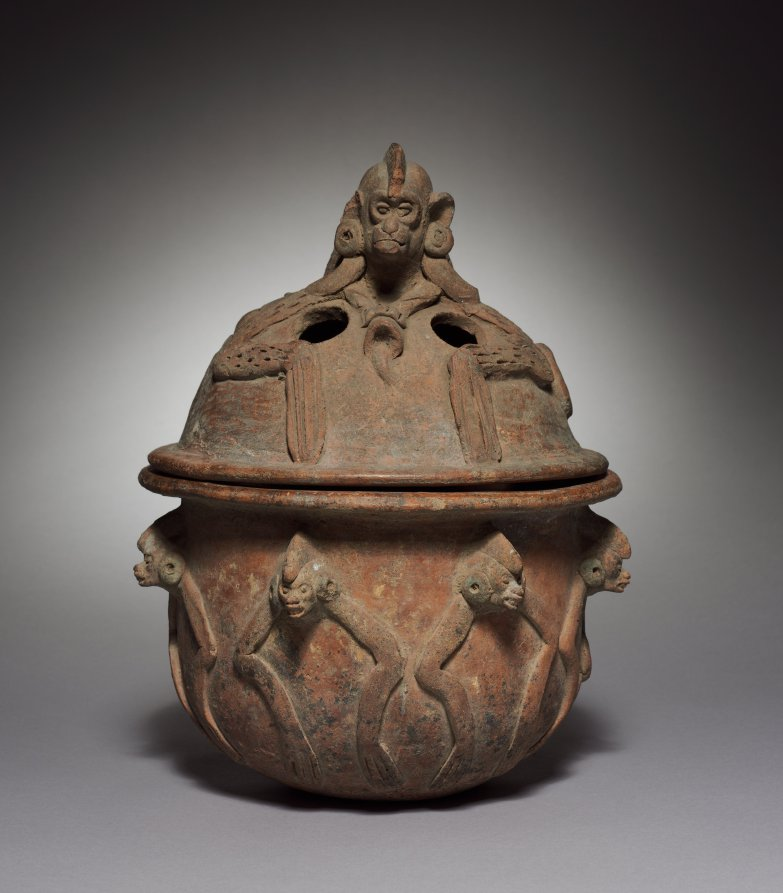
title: Incense Burner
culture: Guatemala, Quiché, San Juan Cotzal, Maya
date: 600–1000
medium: pottery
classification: Ceramic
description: According to the Popol Vuh, a sixteenth-century Quiché Maya manuscript, the world has been created and destroyed twice, and we now live in the third creation. In the second creation, human beings were made from wood and reeds. They lacked souls and minds, and they did not revere their creator. Because of these imperfections, most were killed by an uprising of utensils and domestic animals. Monkeys are the descendents of the survivors.